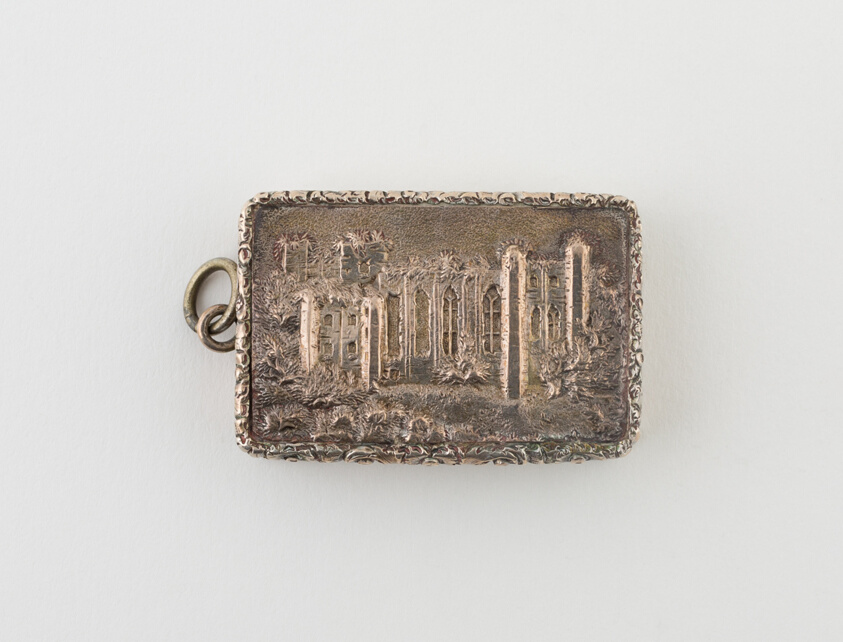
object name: Metalwork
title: Vinaigrette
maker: Nathaniel Mills; Birmingham, England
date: 1845/46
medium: Silver and silver gilt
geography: Birmingham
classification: container for personal use; vinaigrette (container for health care); european decorative arts; metalwork; silver; decorative object/ornament